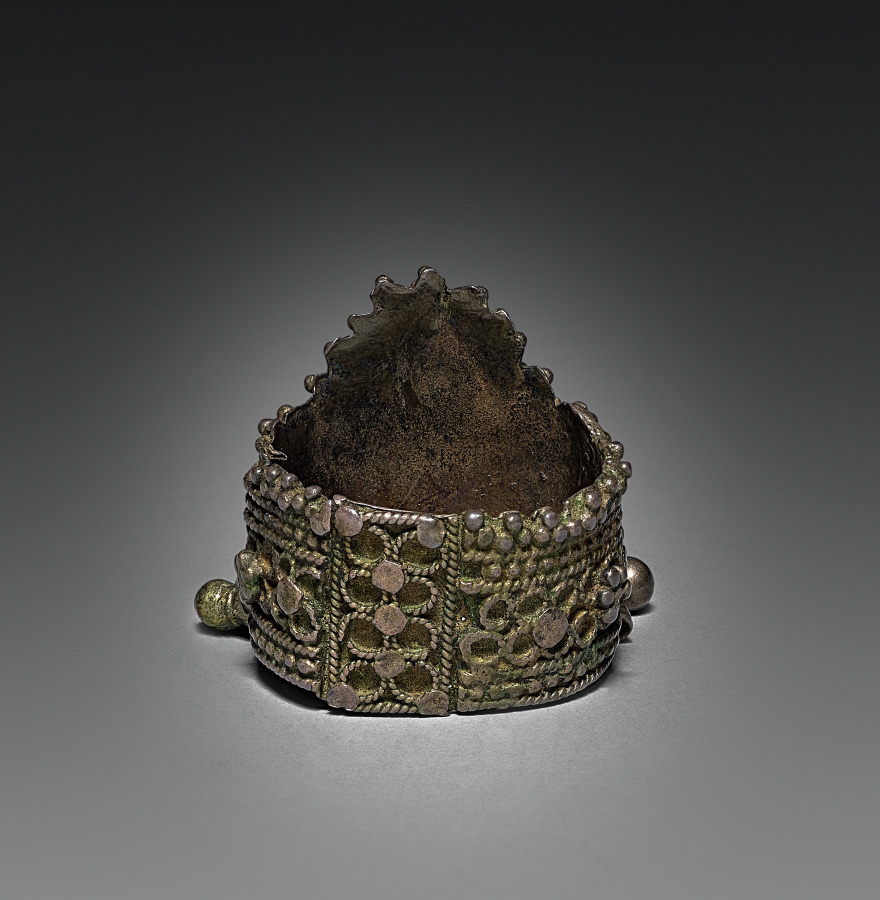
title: Ring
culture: India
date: 1800s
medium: silver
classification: Jewelry